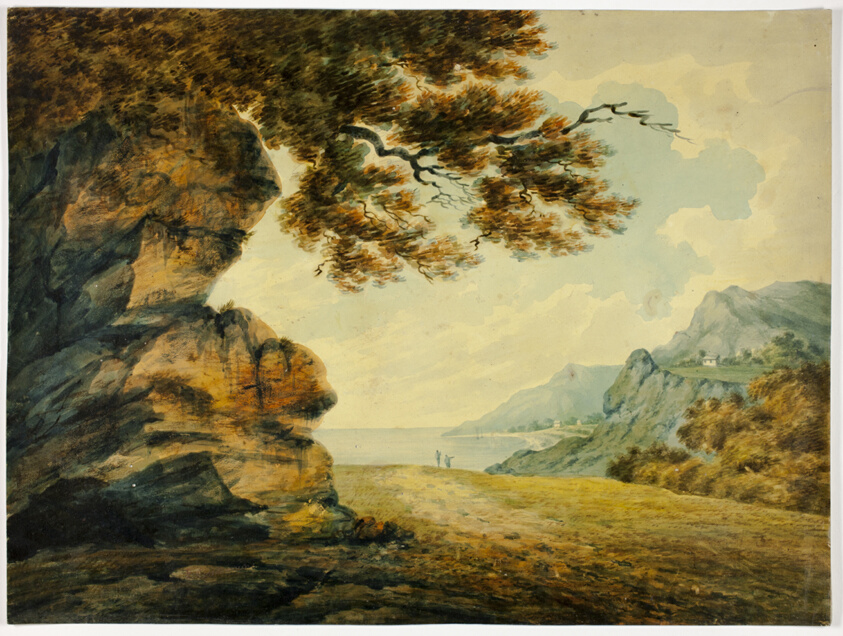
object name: Drawing and Watercolor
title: Two Figures Looking at Bay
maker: Possibly after John "Warwick" Smith (British, 1749-1831); or attributed to Nicholas Pocock (British, 1740-1821)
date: c. 1790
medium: Watercolor, over graphite, with varnish, on cream wove paper, laid down on cream wove card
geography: England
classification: watercolor; drawings (visual works); prints and drawing